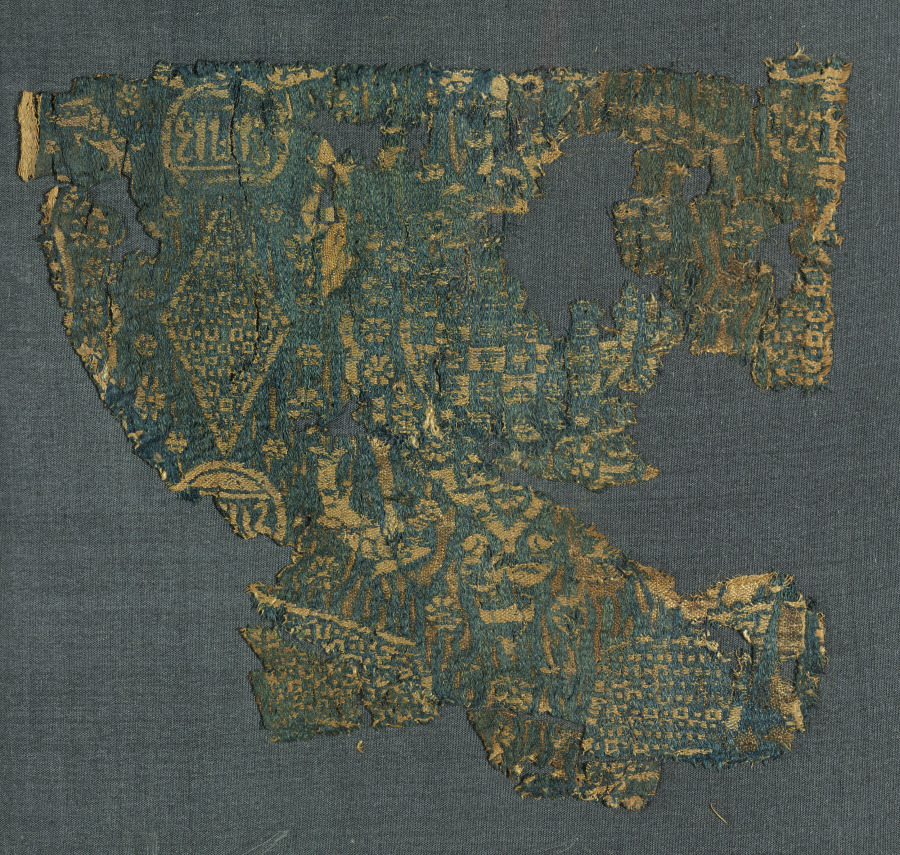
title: Fragment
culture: Egypt or Syria, Mamluk period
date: 1300s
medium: lampas weave, silk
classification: Textile